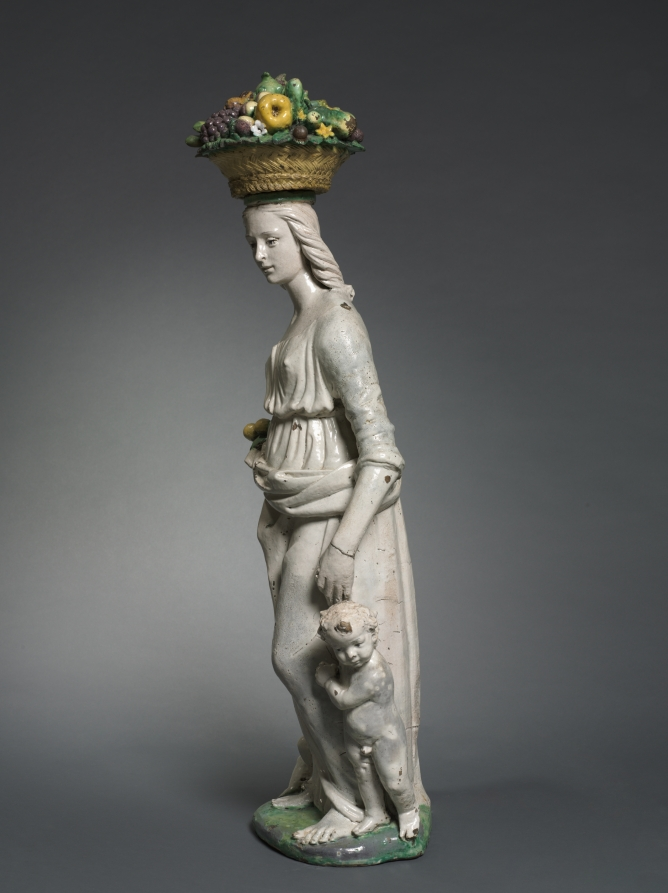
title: Dovizia (Plenty)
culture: Italy, Florence, 16th century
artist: Giovanni della Robbia (Italian, 1469–1529/30)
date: c. 1520–29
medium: glazed terracotta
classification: Sculpture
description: Many elite Florentine Renaissance homes had sculptures of idealized young women carrying nature’s bounty, such as this work. The motif stems from a statue by Donatello (about 1386–1466) that towered over Florence’s main public market. At home, however, the sculpture became a talisman for the family’s well-being. The city-state’s low birth rate was a serious political matter, and such a sculpture was believed to stimulate fertility while also promoting motherhood and bolstering financial success.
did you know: Inspired by an over life-sized, public sculpture by Donatello, Giovanni della Robbia reduced the figure for a domestic setting.